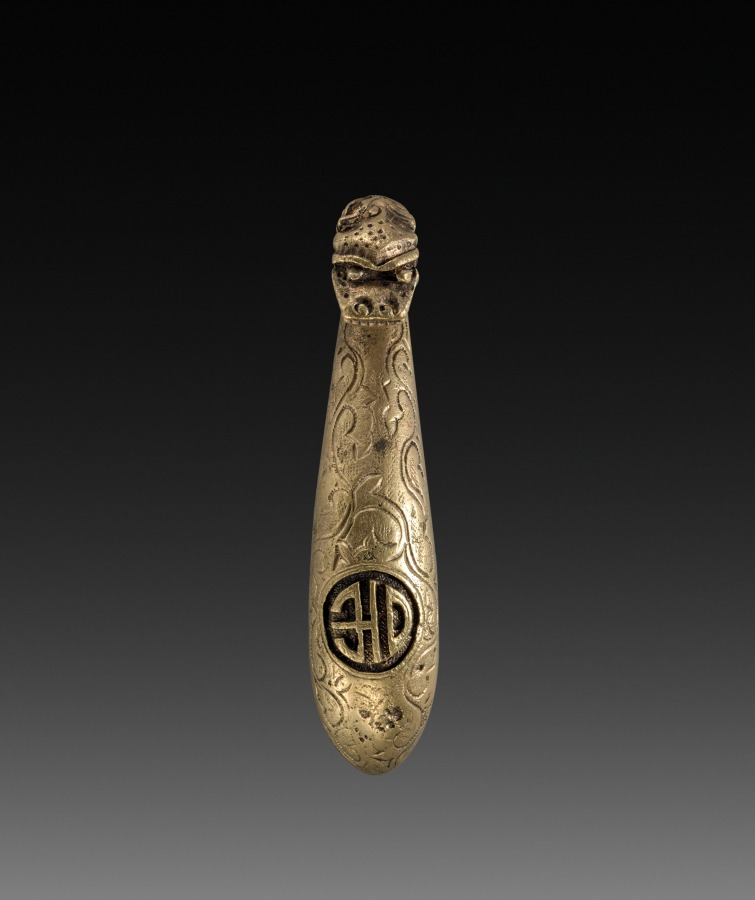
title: Buckle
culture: China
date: 1900s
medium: bronze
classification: Jewelry